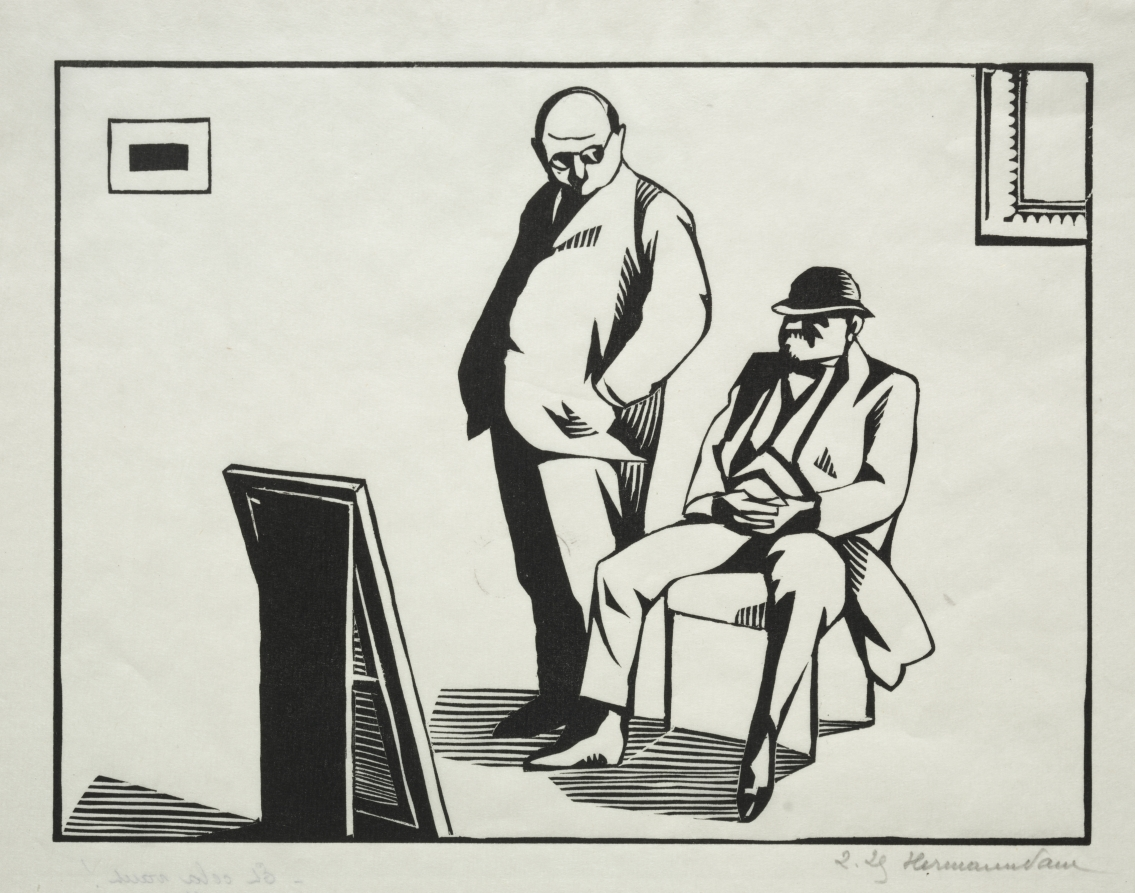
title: Et cela vaut! 100,000! et tout le monde le sait.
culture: France, 20th century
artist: Hermann Paul (French, 1864–1940)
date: c. 1920s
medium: woodcut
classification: Print